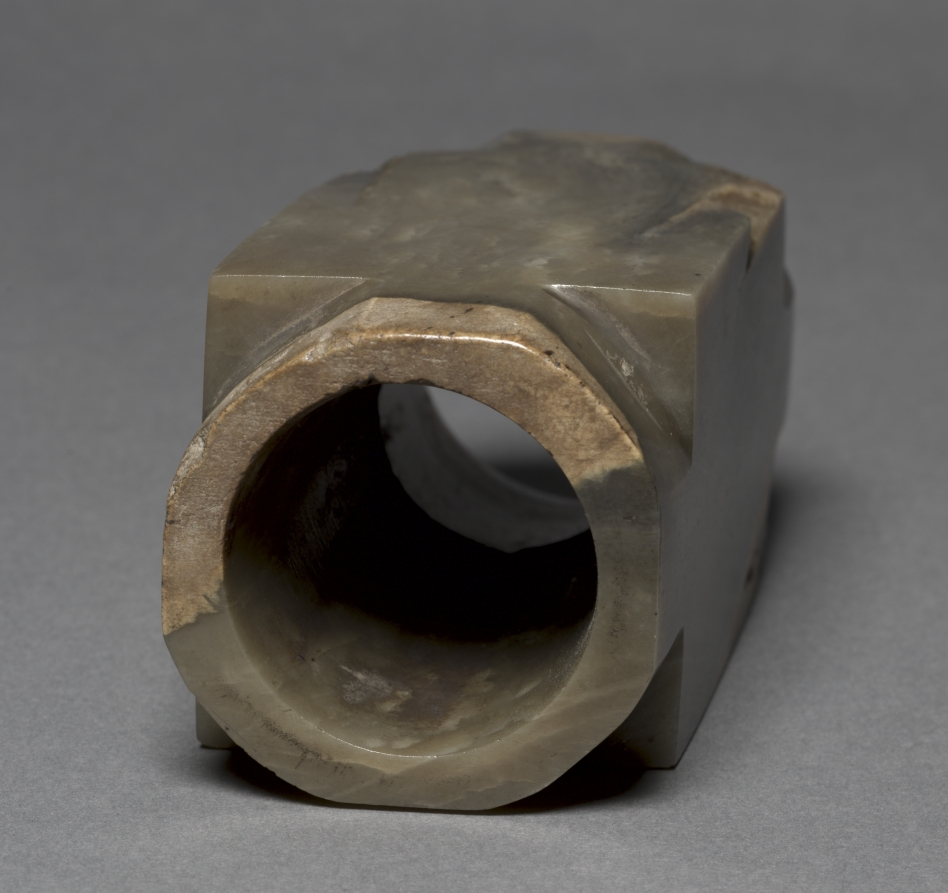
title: Ceremonial Tube (Cong)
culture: China, Shang dynasty (c. 1600–c. 1046 BCE)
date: c. 1600–1056 BCE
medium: jade (nephrite)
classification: Jade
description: The cong, a cylindrical tube with a square outer section, was one of the most impressive jade implements used in ancient rites. The ritual text Rites of Zhou mentions the use of the cong for the worship of the earth. However, its function and meaning in the earlier Neolithic societies are not completely understood.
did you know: The Interior cavity of this piece of jade was bored from both ends, making an irregular ridge near the center.